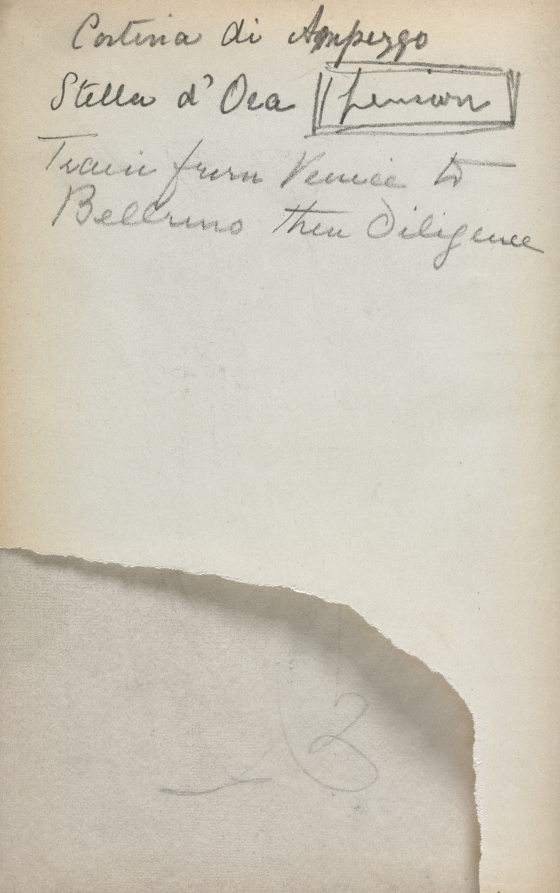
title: Italian Sketchbook: Notes (page 3)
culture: America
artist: Maurice Prendergast (American, born Newfoundland [now Canada], 1858–1924)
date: 1898–1899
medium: pencil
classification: Bound Volume